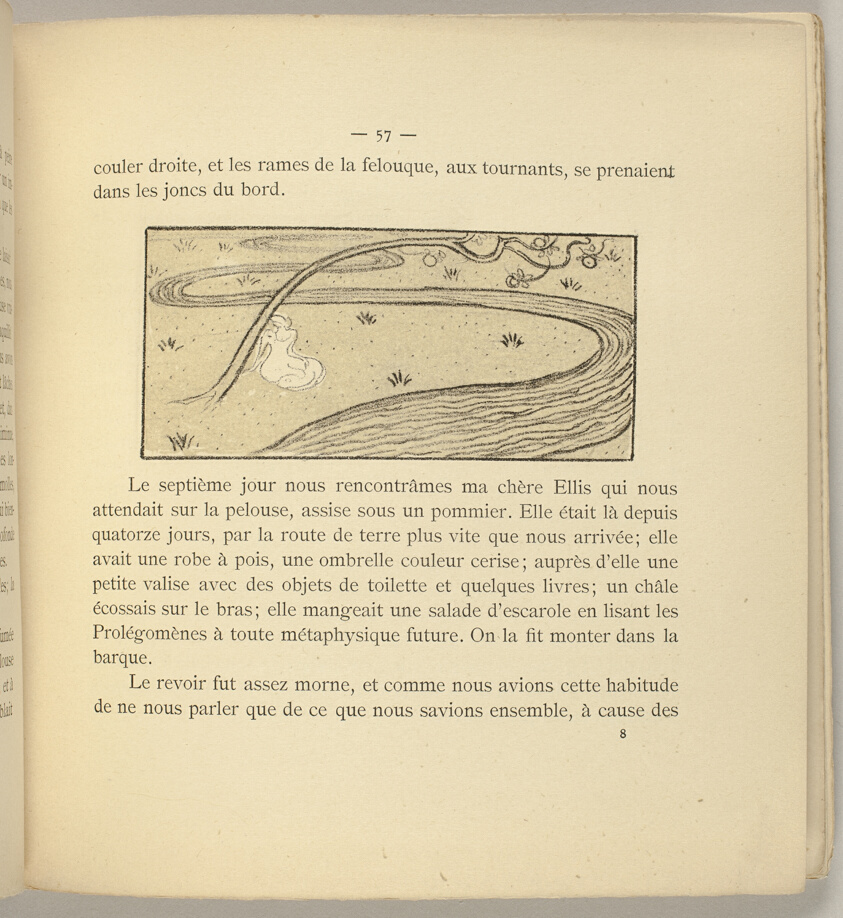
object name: Book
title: The Voyage of Urien (Le Voyage d'Urien)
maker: Maurice Denis (French, 1870-1943); written by André Gide (French, 1869-1951); published by Librairie de l'Art Indépendent (French, 19th century); printed by Paul Schmidt (French, 19th century) and Edward Ancourt (French, active 1860-1899); book bound by A. Devauchelle (French, 19th century)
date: 1893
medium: Book with thirty color lithographs on cream laid paper and one woodcut in black on the cover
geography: France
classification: lithograph; print; prints and drawing; book